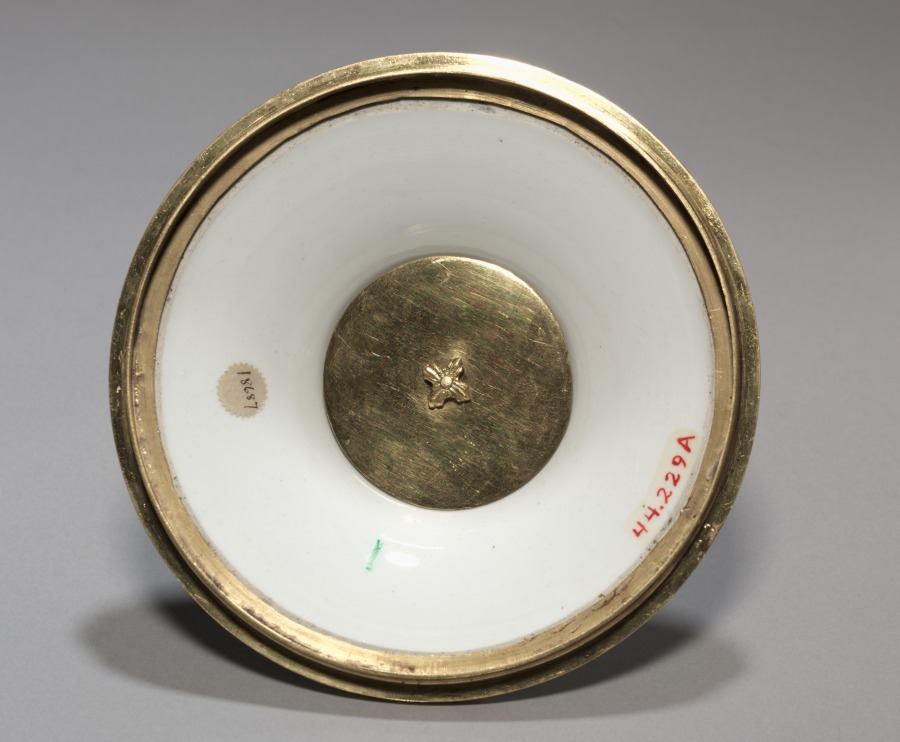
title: Cover for a Vase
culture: Germany, Meissen, 18th century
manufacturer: Meissen Porcelain Factory (German, est. c. 1710)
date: 1749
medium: porcelain mounted in gilt bronze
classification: Ceramic